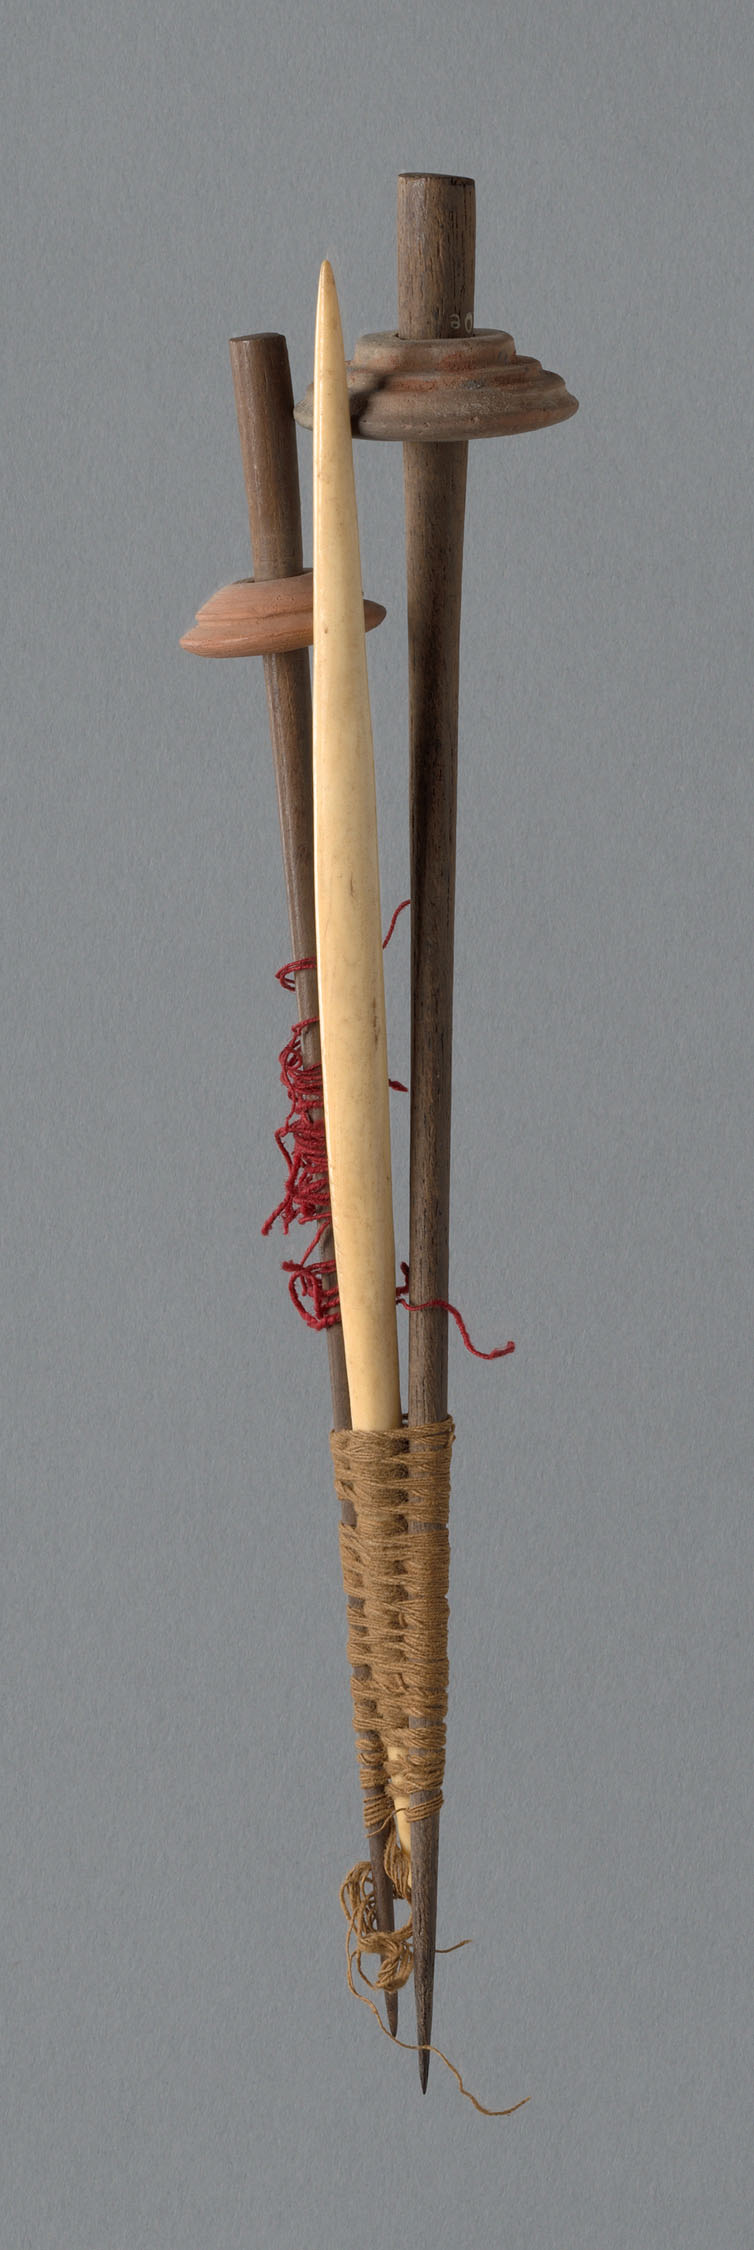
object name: non-art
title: Wooden Spindle with Ceramic Whorl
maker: Peru, Possibly central coast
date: 1000/1476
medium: Wood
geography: Peru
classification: spindles (textile working equipment); textile working equipment; accessories (object genre); textile